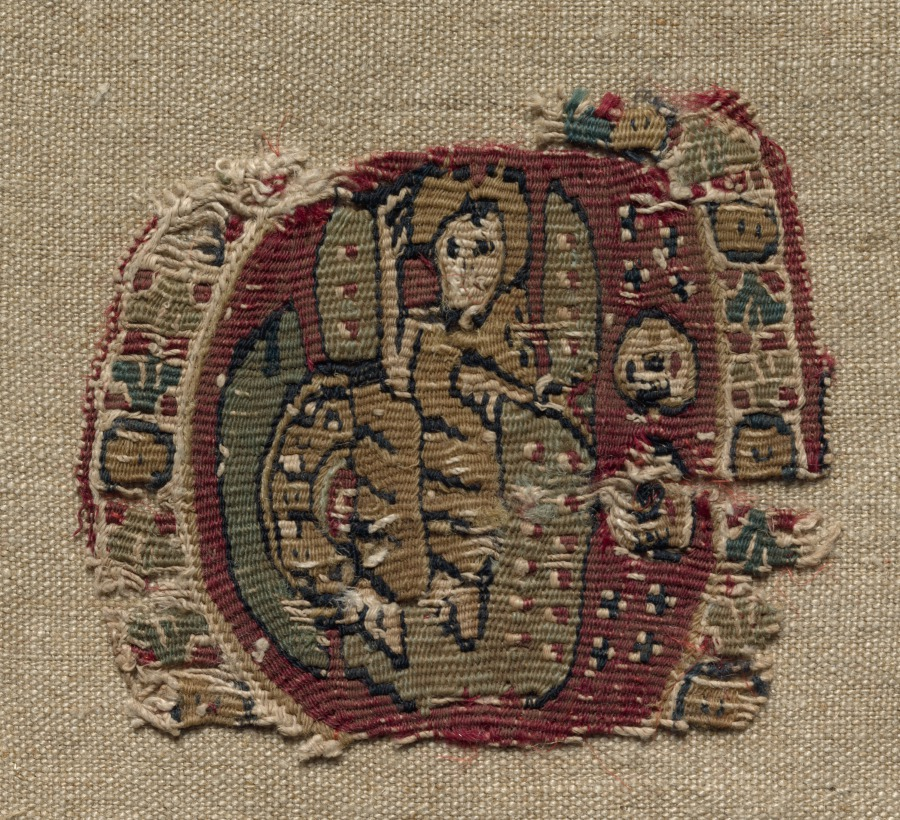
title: Pendant of a Clavus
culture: Egypt, Abbasid period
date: late 700s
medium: tapestry; linen and wool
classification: Textile